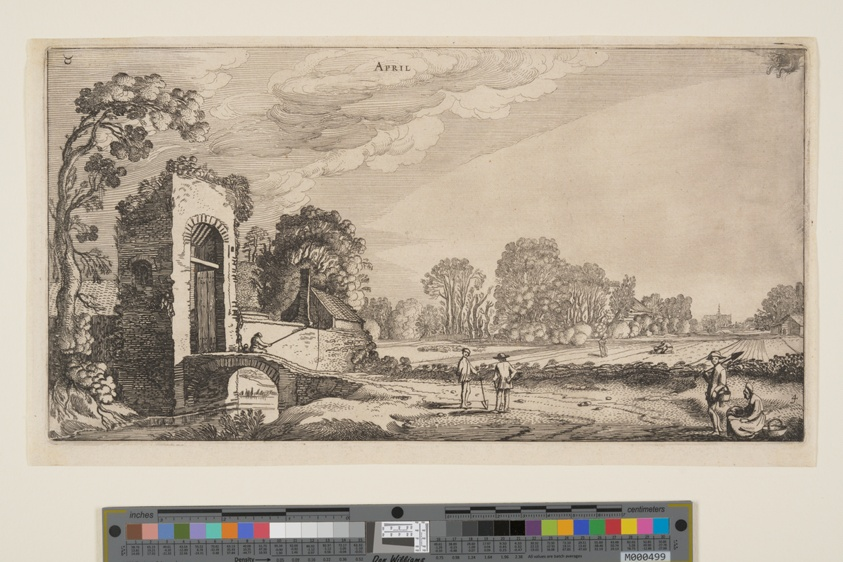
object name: Print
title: April, from The Twelve Months of the Year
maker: Jan van de Velde II (Dutch, c. 1593–1641); after Willem Buytewech (Dutch, c. 1591–1624)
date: 1616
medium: Etching on ivory laid paper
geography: Netherlands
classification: etching; paper; print; prints and drawing